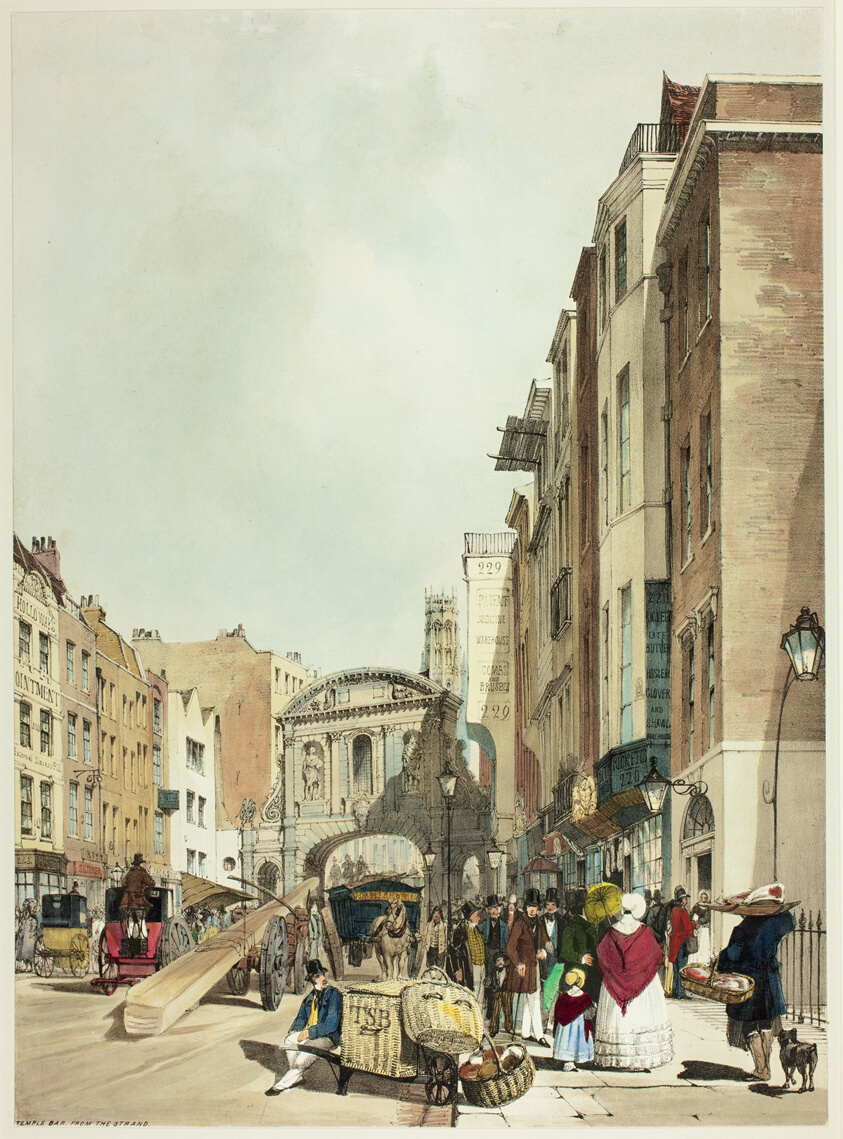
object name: Print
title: Temple Bar from The Strand, plate 22 from Original Views of London as It Is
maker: Thomas Shotter Boys (English, 1803-1874); designed by Charles Ollier (English, 1788-1859)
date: 1842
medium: Hand-colored lithograph on paper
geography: England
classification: lithograph; print; prints and drawing